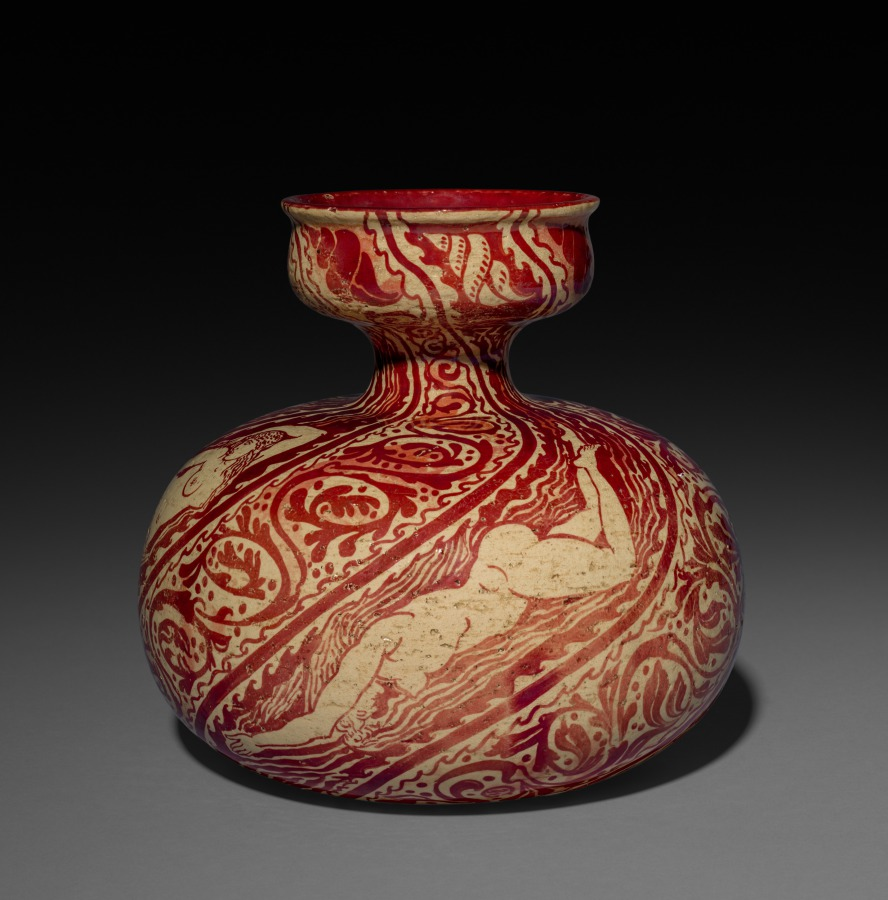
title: Vase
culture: Britain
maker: Walter Crane (British, 1845–1915)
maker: Maw & Co. (British (modern), 1850–1969)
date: 1889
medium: Earthenware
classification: Ceramic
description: Walter Crane was one of the leading figures of the British Arts and Crafts movement. His work helped establish a renewed interest in Renaissance ceramics and the importance of illustration in decorative ceramics. He collaborated with several major manufacturers of decorative furnishings including Maw & Co., an important manufacturer of aesthetic period tiles and other decorative ceramics. This vase is one of a series of vases that Crane designed for Maw around 1889 when they first appear listed in the catalogue of the Arts and Crafts Exhibition Society in London of that year, described along with a series of tiles that Crane also designed for Maw. Its brilliant ruby-red luster surface is a hallmark of Maw’s work featuring Crane’s lyrical designs while referencing earlier 15th- and 16th-century Spanish lusterware.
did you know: The red glaze on this vase resembles the color of oxblood.